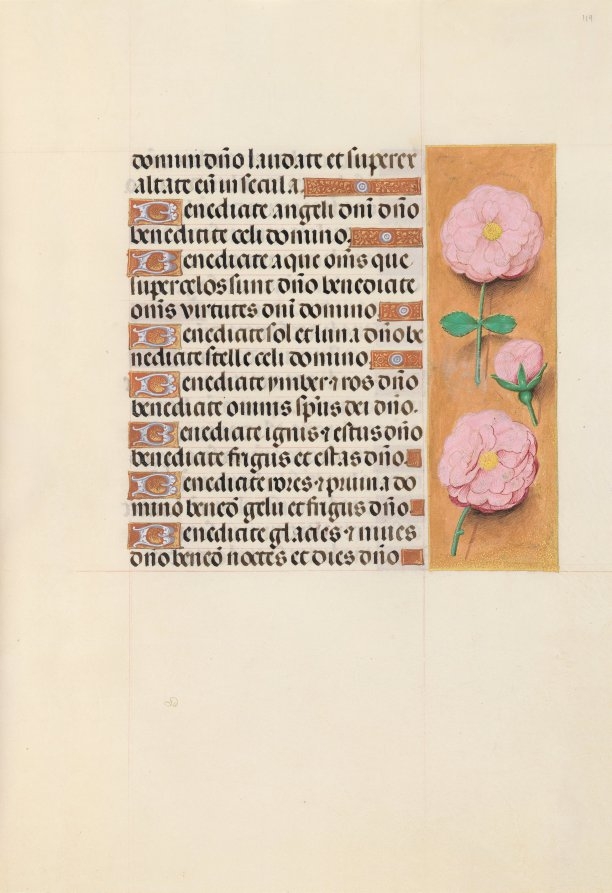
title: Hours of Queen Isabella the Catholic, Queen of Spain: Fol. 119r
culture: Flanders, Ghent and Bruges, late 15th century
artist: Master of the First Prayerbook of Maximillian (Flemish, c. 1444–1519)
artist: and Associates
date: c. 1500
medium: ink, tempera, and gold on vellum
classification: Bound Volume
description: This manuscript was illuminated by a circle of at least five highly organized manuscript painters active in the Flemish cities of Ghent and Bruges. The principal illuminator was Alexander Bening, who painted the majority of the book's miniatures. Manuscripts produced by this circle of artists are renowned for the decoration of their borders, which typically feature a rich variety of realistically-painted flowers, birds, and butterflies. This prayer book, called a book of hours, was intended not for a cleric, but for the private devotions of a lay person-in this case, Isabella the Catholic, Queen of Spain (1451-1504). Isabella's coat of arms embellishes the book's frontispiece. It is unlikely that the book was commissioned by the Queen herself; rather, she probably received it as a diplomatic gift from someone courting her patronage, perhaps Cardinal Francisco Jimenez de Cisneros. A Franciscan friar, Jimenez was dependent upon Isabella for his advancement, first to the post of Queen's confessor in 1492, and then to Archbishop of Toledo in 1495.